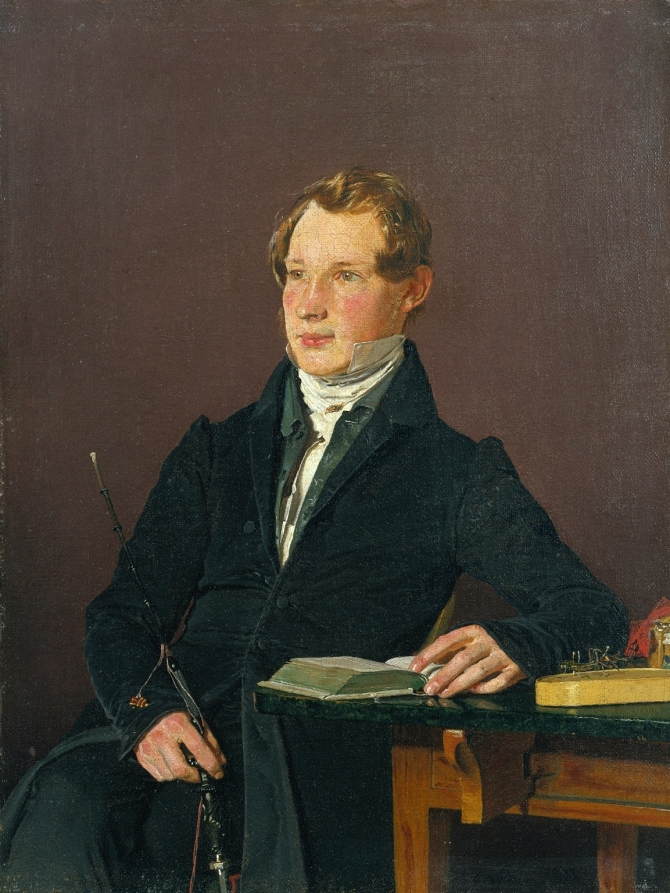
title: Dr. Johann Henning Kjetil Hjardemaal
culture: Denmark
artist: Christen Købke (Danish, 1810–1848)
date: 1833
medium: oil on fabric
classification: Painting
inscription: Signed and dated in black paint bottom right corner: C Köbke 1833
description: The sitter (1812-1844) was born on the island of Saint Thomas, at that time a colony in the Danish West Indies. He was sent to Copenhagen to study medicine and later set up practice at Satrup in Schleswig, then part of Denmark. For health reasons, he returned with his wife to the Virgin Islands, where they both died in 1844.